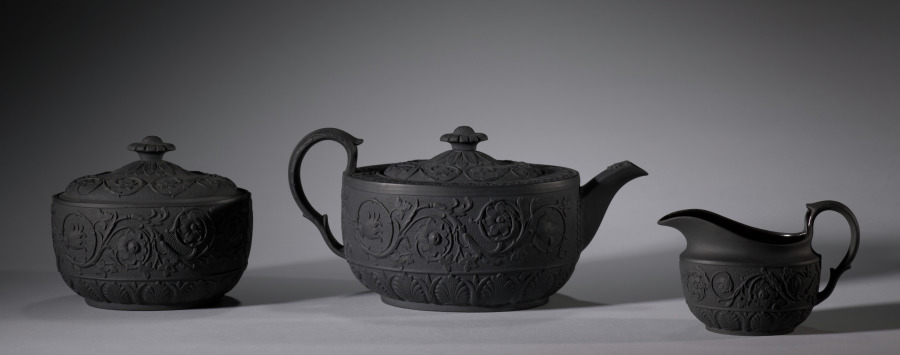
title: Pair of Teapots and Creamer Set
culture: England, 19th century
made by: Elijah Mayer & Son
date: c. 1810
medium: black basalt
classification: Ceramic